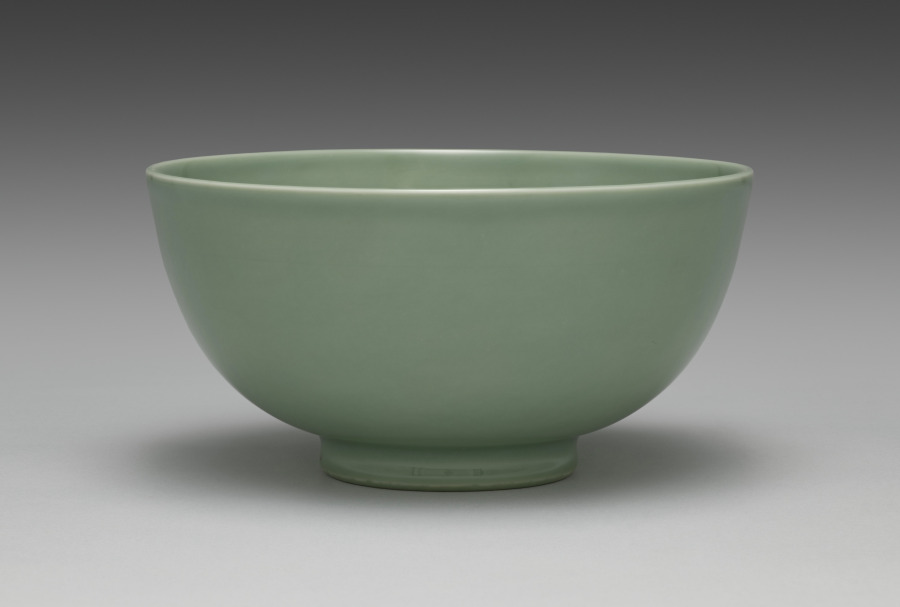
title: Sweets Bowl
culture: Japan, Meiji period (1868–1912)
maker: Seifū Yohei III (Japanese, 1851–1914)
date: 1893–1914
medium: Porcelain with green glaze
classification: Ceramic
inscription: 彫銘：清風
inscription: 共箱の箱書：（蓋裏）秘色窯菓子鉢 三世清風晟山作（印：帝室技藝員）襲（袭）四世清風與平識之（印：清風）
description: The box for this sweets bowl has an attestation by Yohei IV that it is a work by Yohei III and in the hisokuyō (C. mise yao), or “mysterious color ware,” style. In fact, as actual examples of mise ware were unknown in Yohei III’s time, he would have associated the color with the green-glazed ceramics of kilns at Longquan, also in Zhejiang Province, produced during the Yuan dynasty.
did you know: Many ceramics created by the Seifū Studio refer to and emulate Chinese ceramics in form and glazing.